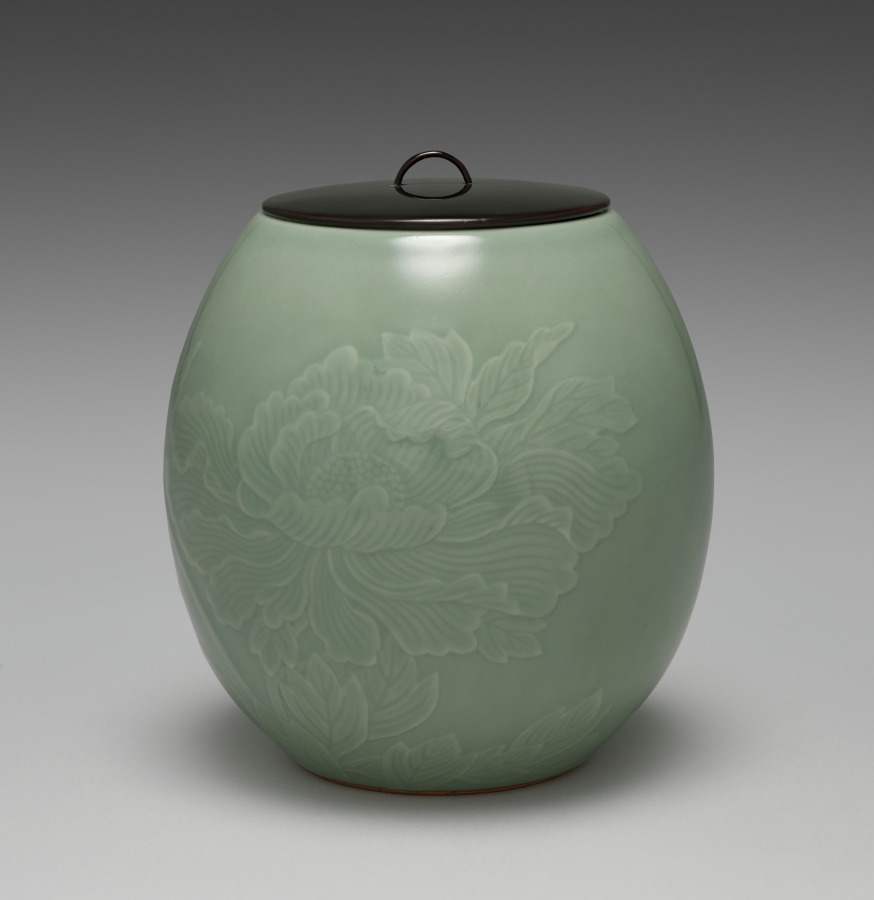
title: Water Container with Peonies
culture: Japan, Meiji period (1868–1912)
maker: Seifū Yohei III (Japanese, 1851–1914)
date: 1900–1914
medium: Porcelain with molded and carved design, green glaze, and black lacquered lid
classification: Ceramic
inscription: 清風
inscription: 帝室技芸員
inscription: 清風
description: This ceramic is an especially accomplished example of Yohei III’s combination of an allover translucent colored glaze with molded and carved designs. It features the peony as its primary motif. The water container, or mizusashi, has a green glaze, and its design takes into consideration the rounded shape and the seated position of the host and guests. It begins low on the body with a flower just beginning to open and continues with another flower a bit higher up, with its petals fully extended and beginning to open outward. It finishes with a flower in full bloom, petals and leaves unfurled and spread outward from the center, now occupying almost the entire surface. The water container once belonged to the Hosokawa family, whose go-between corresponded with Yohei IV about the piece. Yohei IV thanked them for their payment and requested that despite his father’s death in the previous year, they continue to favor the studio with their orders. The letter and its envelope, as well as an auction tag, remain with the object.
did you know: This water container may also serve as a site for cultural reckoning, as when the life cycle of a flower prized in East Asia as a symbol of wealth is displayed across a Japanese chanoyu vessel whose glaze is associated with the seats of power in China and Korea.